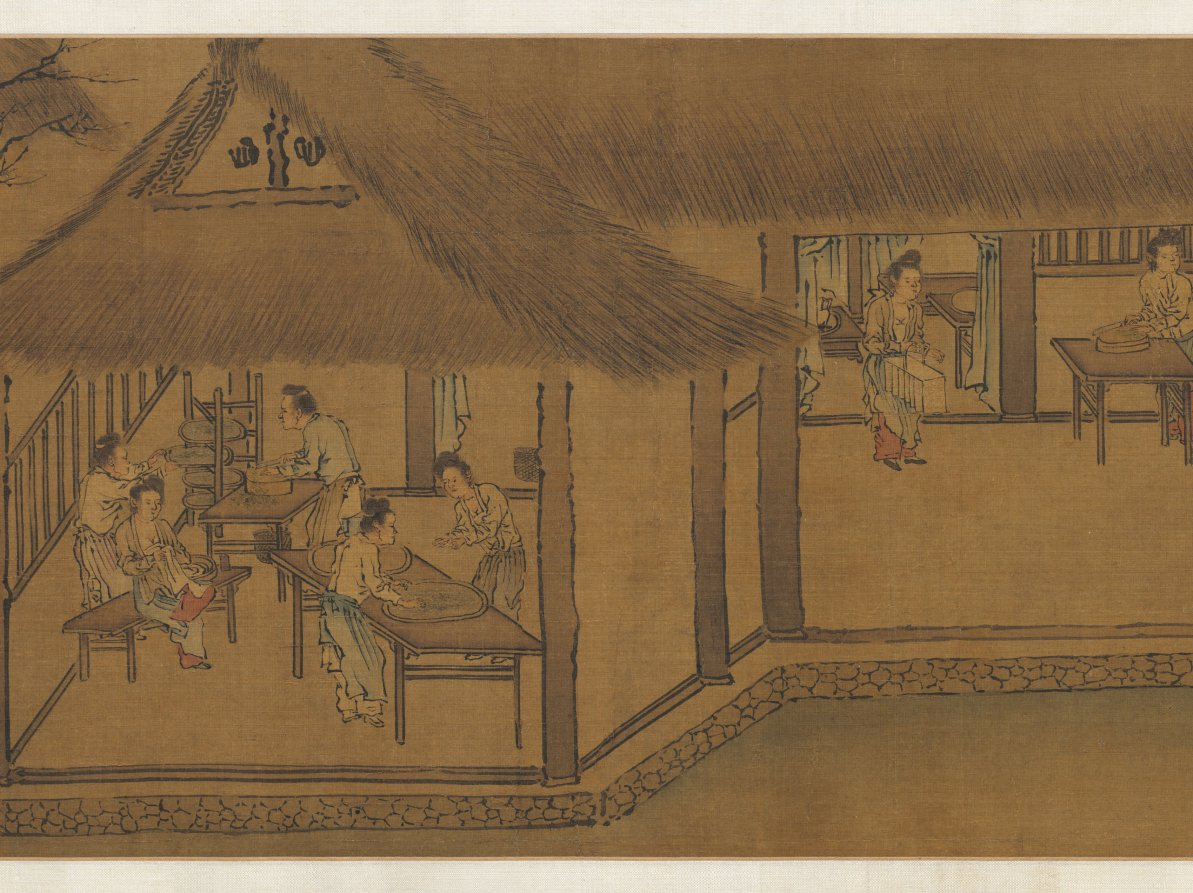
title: Sericulture (The Process of Making Silk)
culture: China, Southern Song dynasty (1127-1279)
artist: attributed to Liang Kai (Chinese, mid-1100s–early 1200s)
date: early 1200s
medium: Handscroll; ink and color on silk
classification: Painting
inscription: 3 colophons and 7 seals of Ch'eng Ch'i (20th c.).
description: By the Southern Song period, the economic center of the silk industry had shifted to the lower Yangzi delta, while the north continued to be troubled by wars. Divided into three sections, the handscroll illustrates 14 steps in the process of making silk, from the raising of silkworms to the weaving of silk cloth. The scroll’s scenes follow the illustrations of Lou Shou’s (1090–1162) Pictures of Tilling and Weaving (gengzhi tu), the first recorded painting of this genre, which was conceived in Hangzhou around 1145. However, in the Cleveland painting the artist groups several scenes of sericulture together under the roof of an open structure.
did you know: The painting is attributed to Liang Kai, a court artist active from about 1201 to 1204 at the Imperial Painting Academy in the city of Hangzhou, a major silk weaving center from that time to the present day.